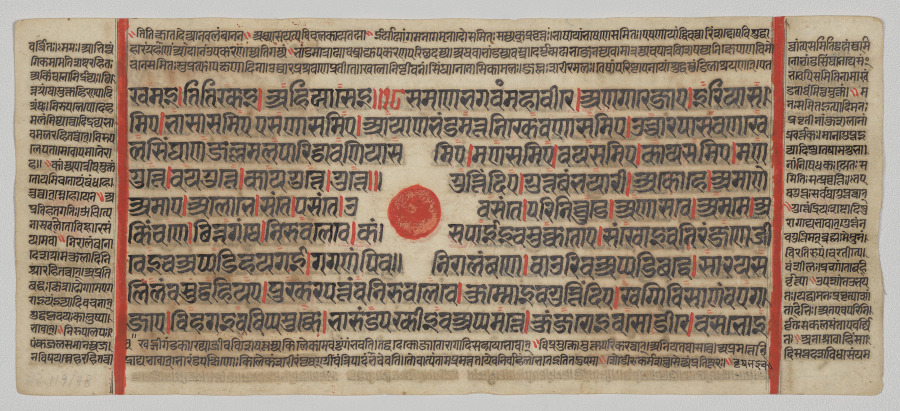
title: Text, Folio 38 (recto), from a Kalpa-sutra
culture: Western India, Gujarat, last quarter of the 15th century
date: c. 1475–1500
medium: Gum tempera, ink, and gold on paper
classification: Painting